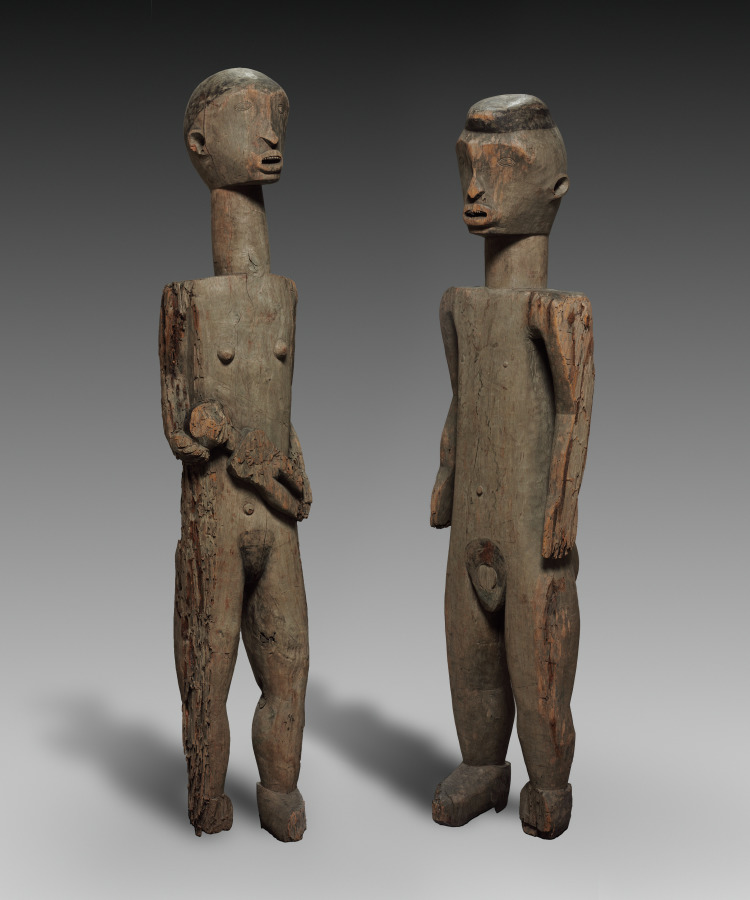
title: Pair of Figures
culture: Africa, Central Africa, Democratic Republic of the Congo or Central African Republic (most likely), possibly Monzombo-style maker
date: late 1800s–early 1900s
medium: Wood and iron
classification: Sculpture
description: The Ubangi region's history of successive migrations and assimilations has resulted in numerous exchanges of religious beliefs and ritual practices. Despite some stylistic traits, including the heart-shaped faces and the male's crested coiffure, this figure with its female pair is unlike any other in the Ubangian corpus. Based on indirect evidence, the pair is said to represent the culture's primordial couple.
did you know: This male and female pair is said to represent the culture's primordial couple.